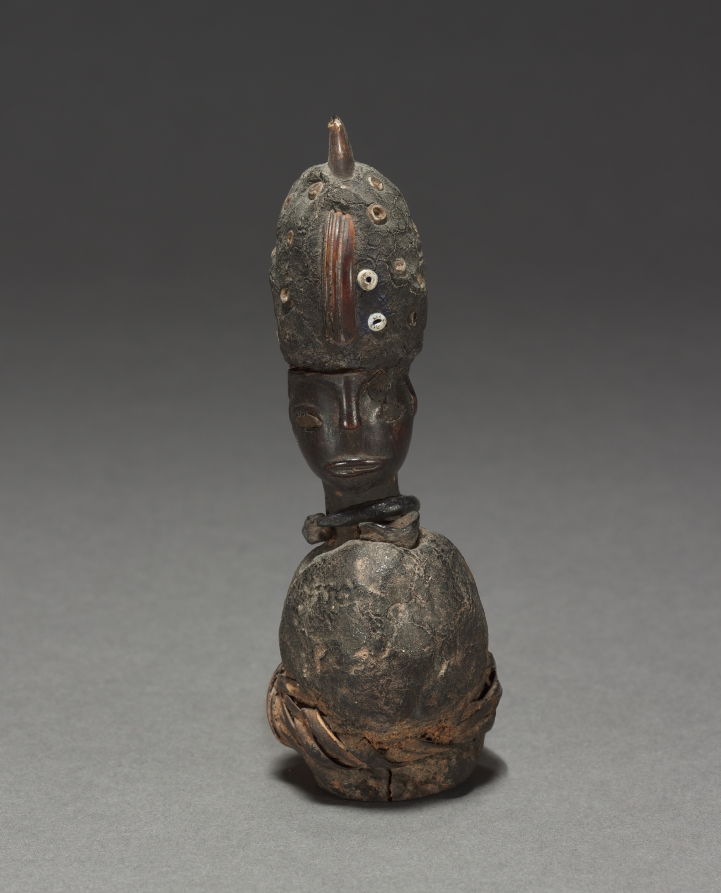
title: Power figure (nkisi)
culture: Central Africa, Republic of the Congo, Kongo people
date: late 1800s-early 1900s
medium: Wood, organic materials (including resin), iron, reed, tooth, seashell or glass beads, and possibly plastic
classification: Sculpture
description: One of seven anthropomorphic figurines, these minkisi contained medicines in which an ancestral spirit was believed to reside. Minkisi were objects of communal use; if conflict arose between two citizens, the Nkisi figure, along with the nganga (ritual leader) helped resolve the dispute. This small figure belonged to “the sorcerer of Loango,” chief of all sorcerers of that region (a province and port in West Central Africa).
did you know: This small figure belonged to “the sorcerer of Loango,” chief of all sorcerers of that region (a province and port in West Central Africa).